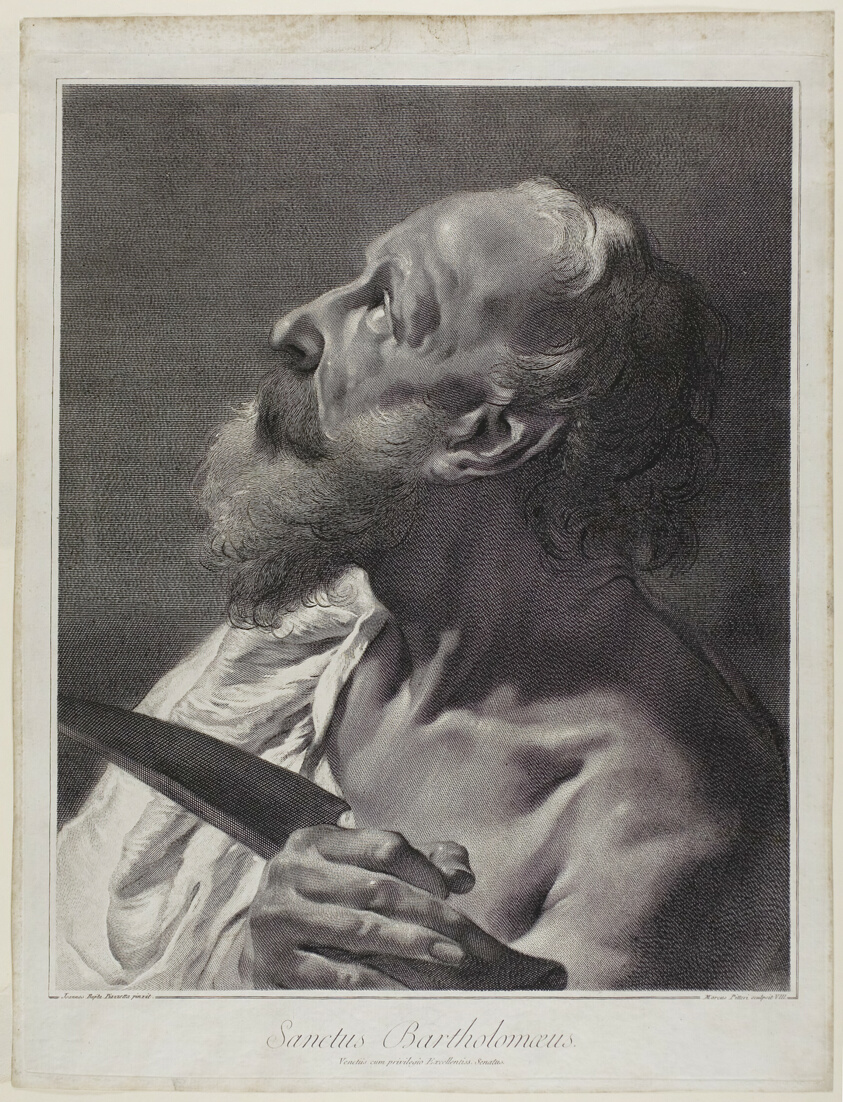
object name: Print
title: Saint Bartholomew, from The Holy Family and the Twelve Apostles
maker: Giovanni Marco Pitteri (Italian, 1702-1786); after Giovanni Battista Piazzetta (Italian, 1682-1754)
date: 1742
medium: Engraving in black on paper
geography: Italy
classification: engraving; print; prints and drawing